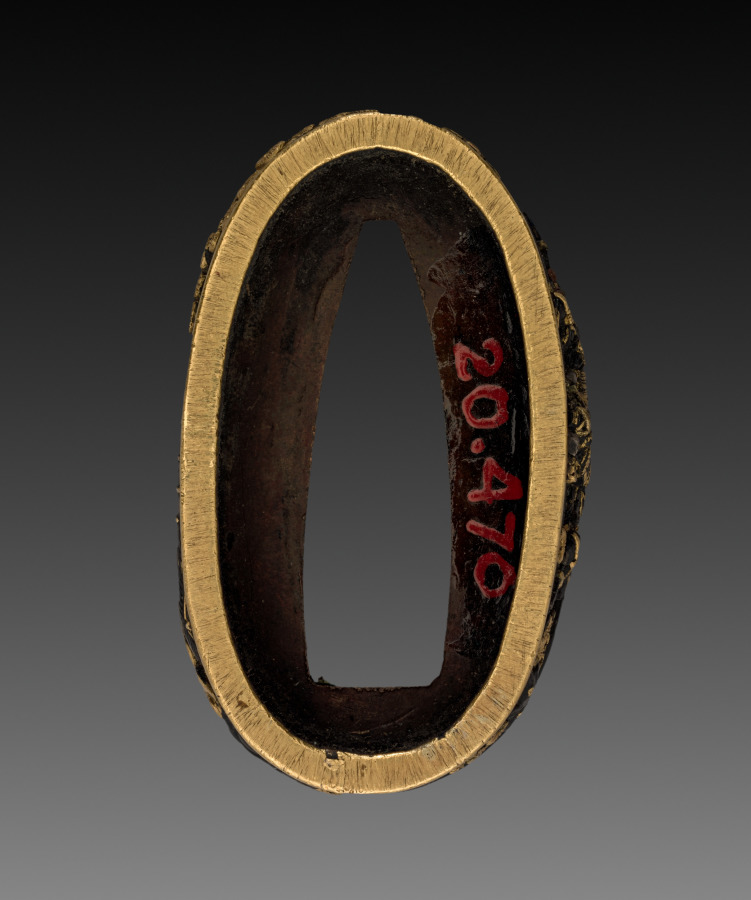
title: Sword-Hilt Collar (Fuchi)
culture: Japan, Edo period (1615–1868)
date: 1700–1850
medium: shakudo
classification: Arms and Armor